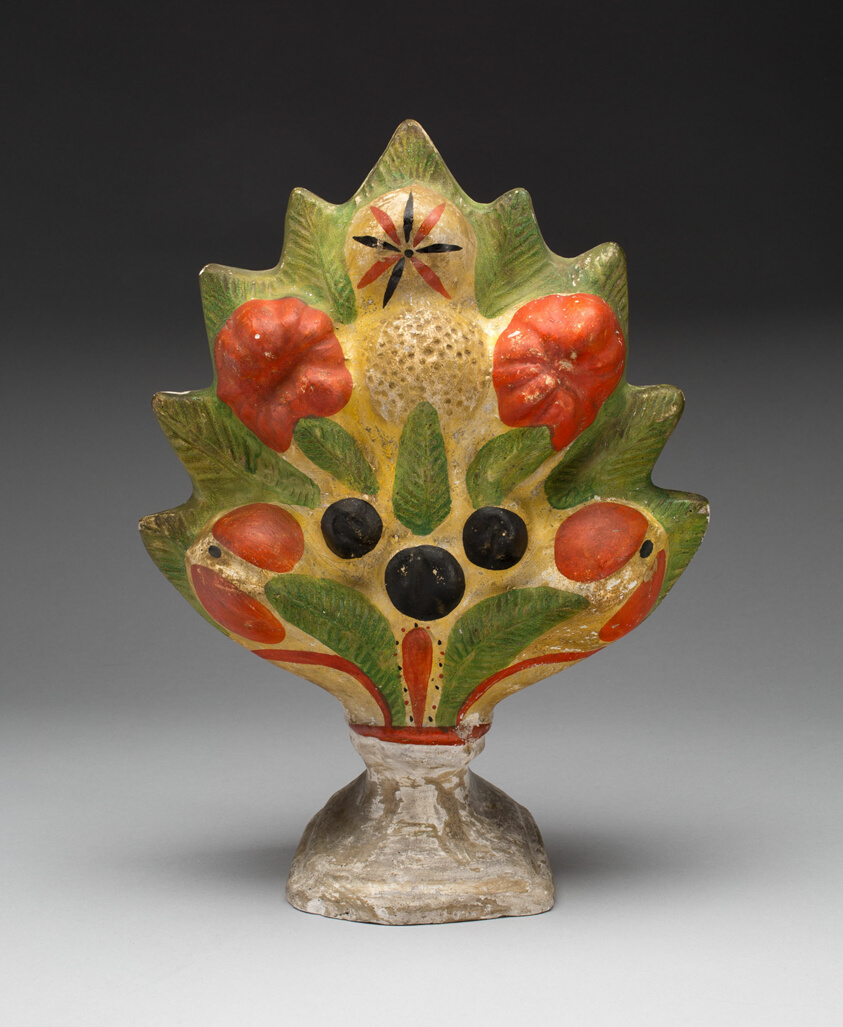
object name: Decorative Arts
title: Fruit sculpture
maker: Artist unknown (American, 19th century)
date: 1800–1900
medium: Chalkware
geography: United States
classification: sculpture; metalwork; american decorative arts; american arts; decorative arts